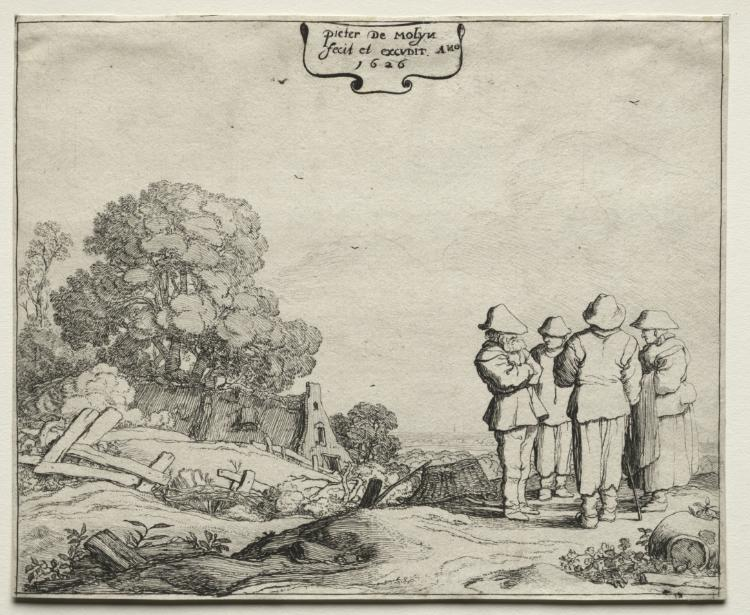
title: Landscape with Four Peasants Conversing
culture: Netherlands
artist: Pieter Molyn (Dutch, 1595–1661)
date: 1626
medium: etching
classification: Print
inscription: On plate, middle top, in cartouche: "Pieter de Molyn fecit et excvdit. Ano 1626."